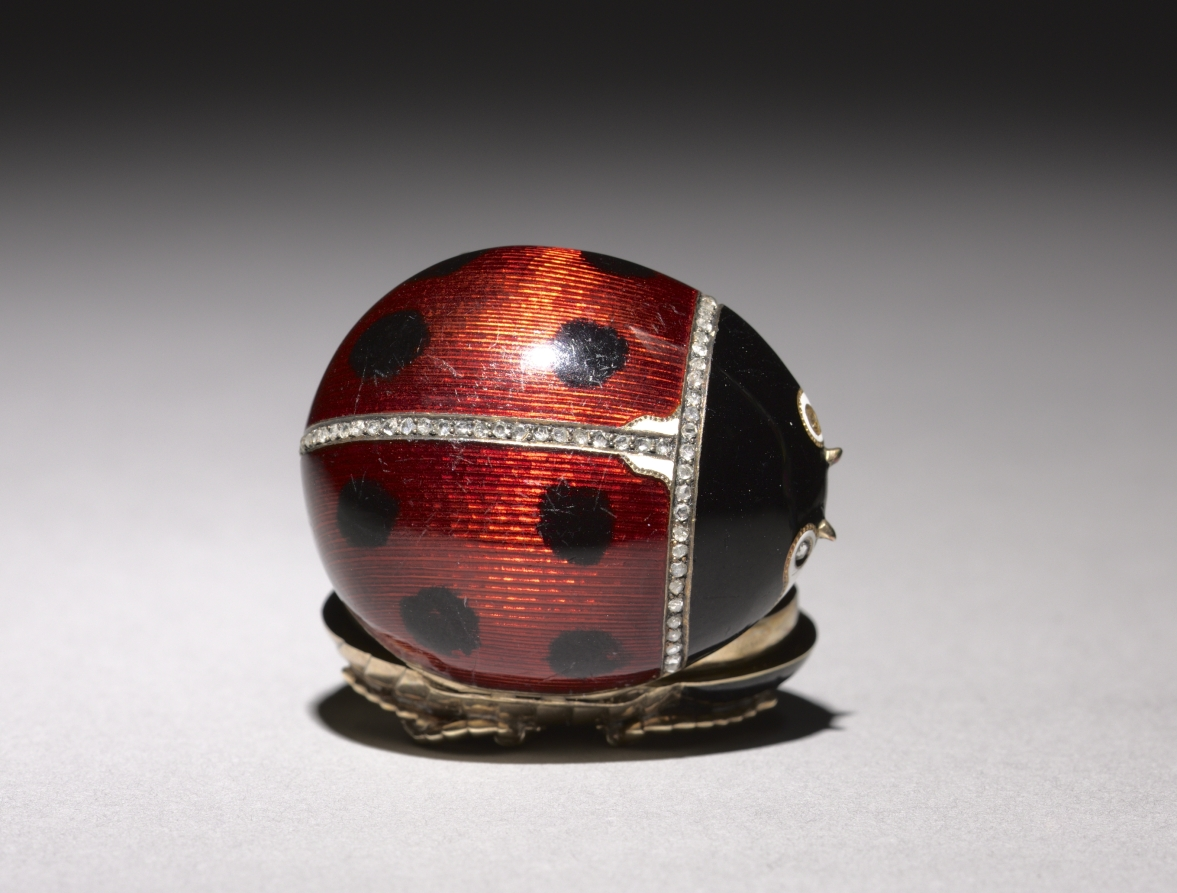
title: Ladybird Beetle Pillbox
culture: Russia, St. Petersburg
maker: House of Fabergé (Russian, 1842–1918)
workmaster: Mikhail Evlampievich Perkhin (Russian, 1860–1903)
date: 1896–1903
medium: gold, enamel, diamonds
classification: Miscellaneous